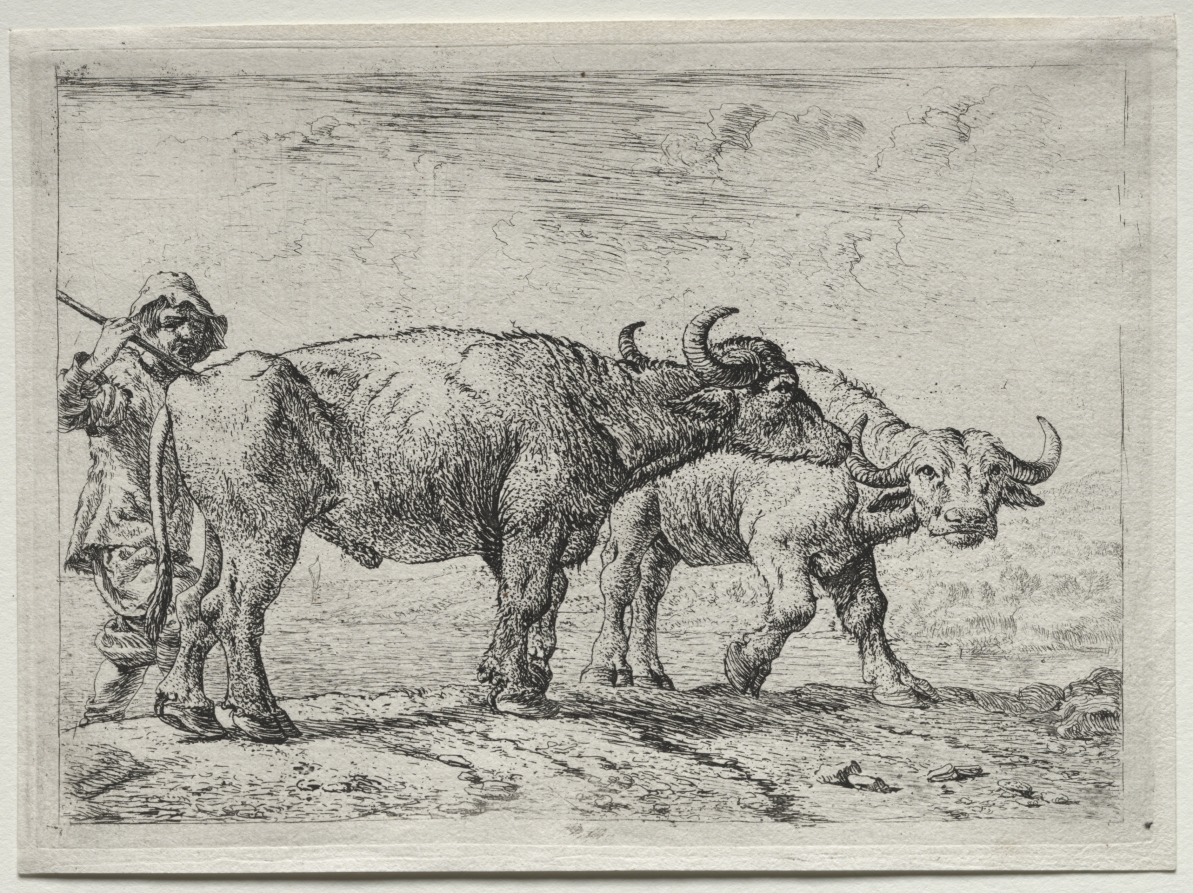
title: The Two Buffaloes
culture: Netherlands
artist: Pieter van Laer (Dutch, 1592–c. 1642)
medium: etching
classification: Print